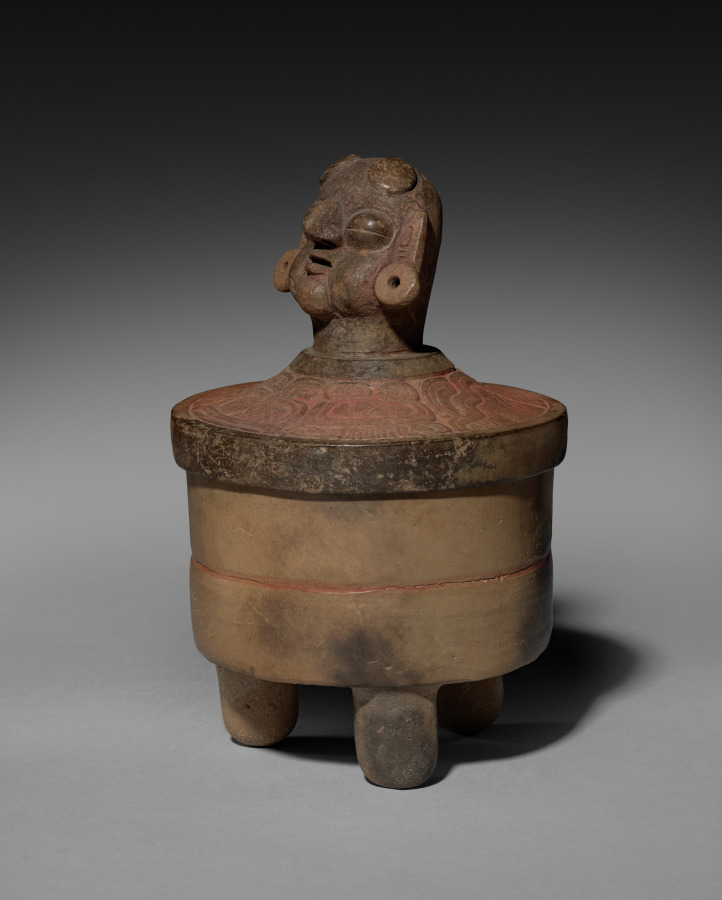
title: Tripod Vessel with Lid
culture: Mexico or Central America, Maya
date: 250–600 CE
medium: earthenware with pigment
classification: Ceramic